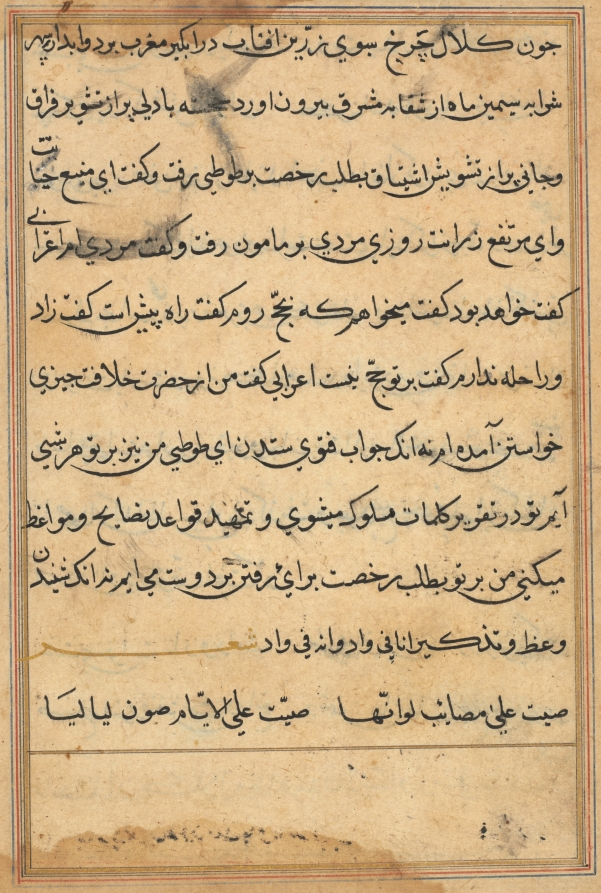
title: Page from Tales of a Parrot (Tuti-nama): text page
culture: Mughal India, court of Akbar (reigned 1556–1605)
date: c. 1560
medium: gum tempera, ink, and gold on paper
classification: Painting